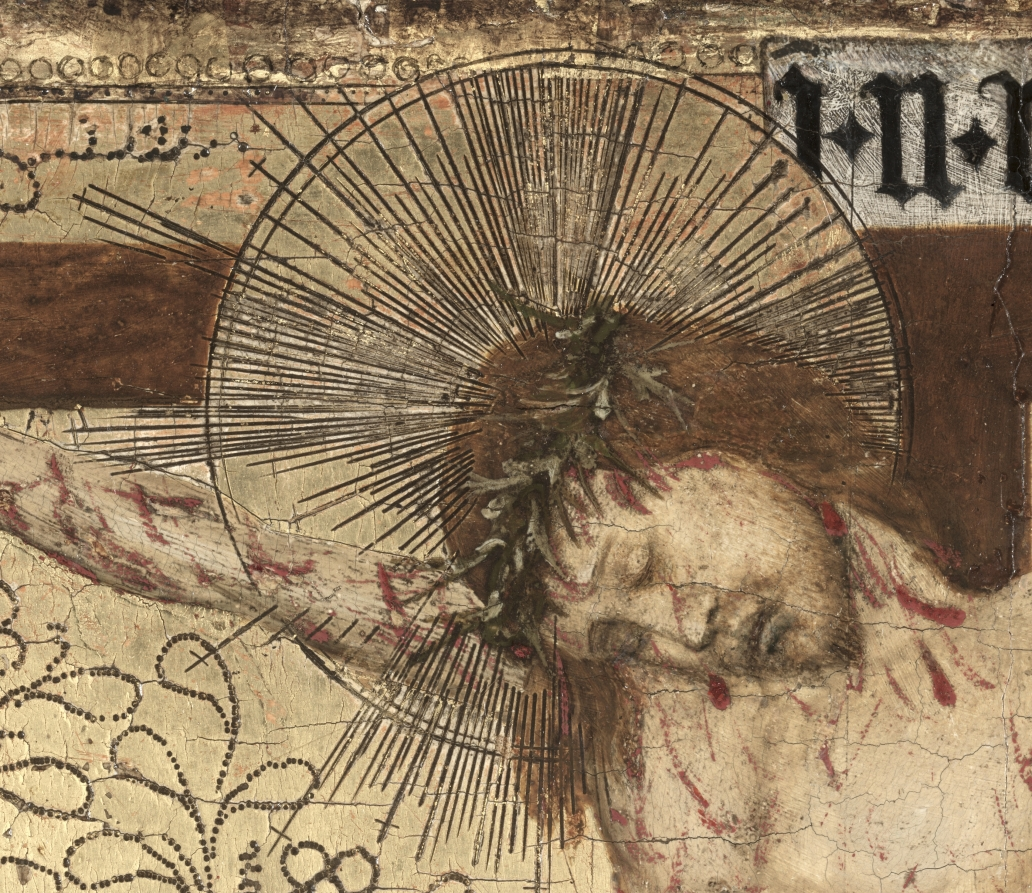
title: Calvary with a Carthusian Monk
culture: France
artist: Jean de Beaumetz (French, c. 1335–1396)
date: 1389–95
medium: oil on oak panel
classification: Painting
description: Jean de Beaumetz became the official court painter to the Burgundian duke, Philip the Bold, in 1376. Between 1389 and 1395 he created devotional paintings for the monks’ cells at the Chartreuse de Champmol, the monastery founded by Philip and his wife Margaret to house the ducal tombs. This panel, originally one of 26, is only one of two that have survived; the second is preserved in the Louvre in Paris. The Carthusians were intensely devoted to the Passion of Christ; particularly bloody images of the Crucifixion often decorated their cells. Isolated from one another, the monks contemplated the sacrifice of Christ (emphasized here by the presence of a Carthusian monk at the foot of the cross) creating an empathetic connection with the suffering of the Virgin who faints in the arms of the two Marys. Saint John the Evangelist, on the right, bows his head in sorrow. The punched decoration in the gold background represents the Trees of Life and Knowledge, emphasizing the biblical connection between Adam and Christ.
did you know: Records exist detailing the delivery of the this panel and 25 others to the monastery Chartreuse de Champmol, for use in the monks' cells.